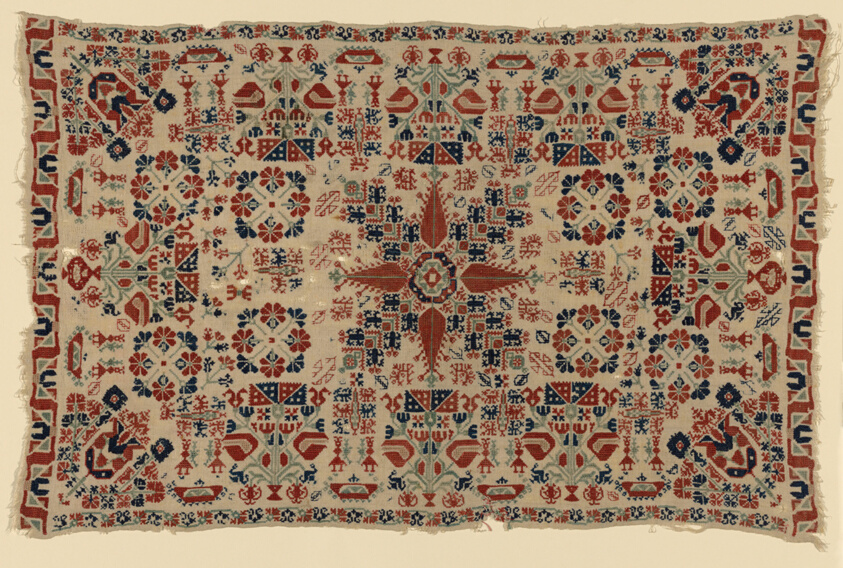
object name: Textile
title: Cover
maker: Spain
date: 18th century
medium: Linen; cross stitch and punch work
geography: Spain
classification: textile; needlework (visual works)